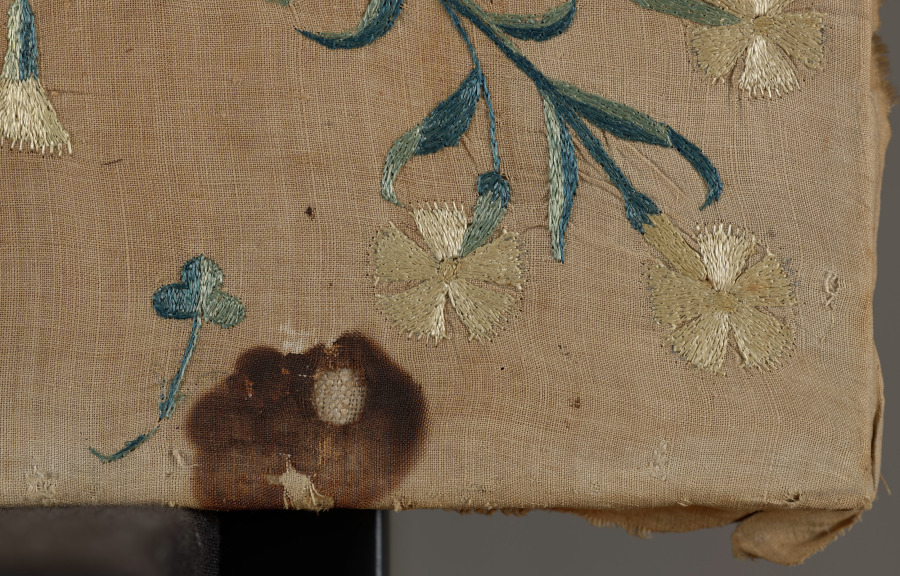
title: Christ Gathering Roses, Centerpiece of an Altar Cloth(?)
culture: Germany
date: early to mid-1400s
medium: Linen: plain weave; silk: embroidery (split stitch)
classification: Embroidery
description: The altar cloth was probably made for a southern German convent in the 15th century. While the focus on the Christ child is typical for female spirituality in the late Middle Ages, there are no comparative examples for the Christ child picking flowers. The detailed depiction of plants and flowers is of unusual quality for the embroideries of this period.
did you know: The Christ child has put aside his globe to devote himself entirely to picking flowers.